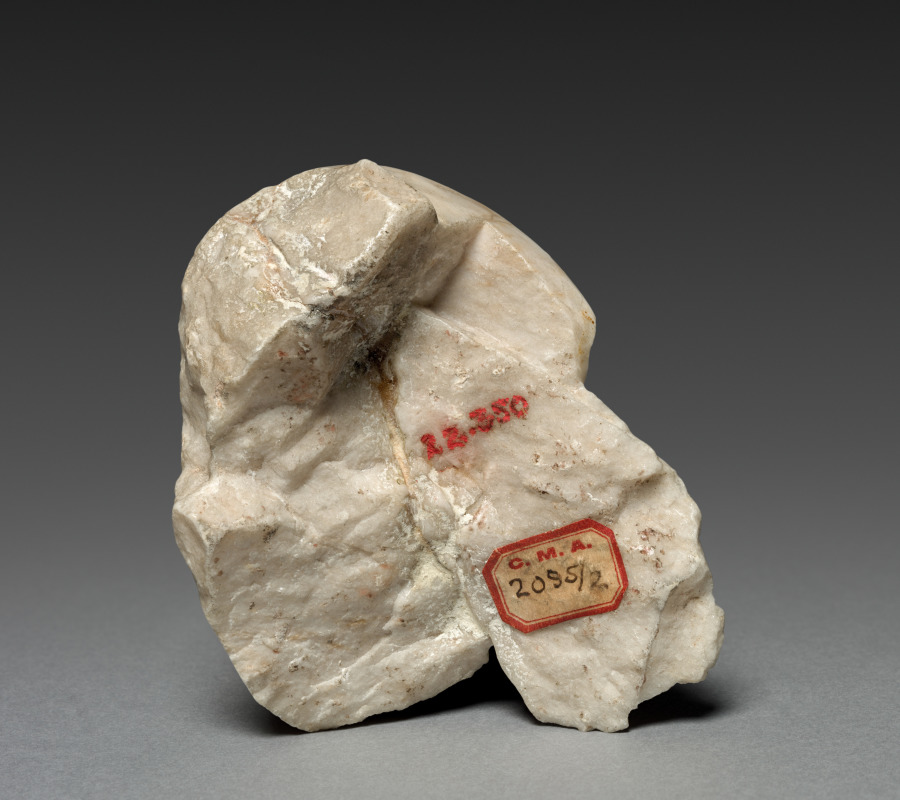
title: Head of a Mourner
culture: Spain, Poblet(?), 15th century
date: 1400s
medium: marble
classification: Sculpture